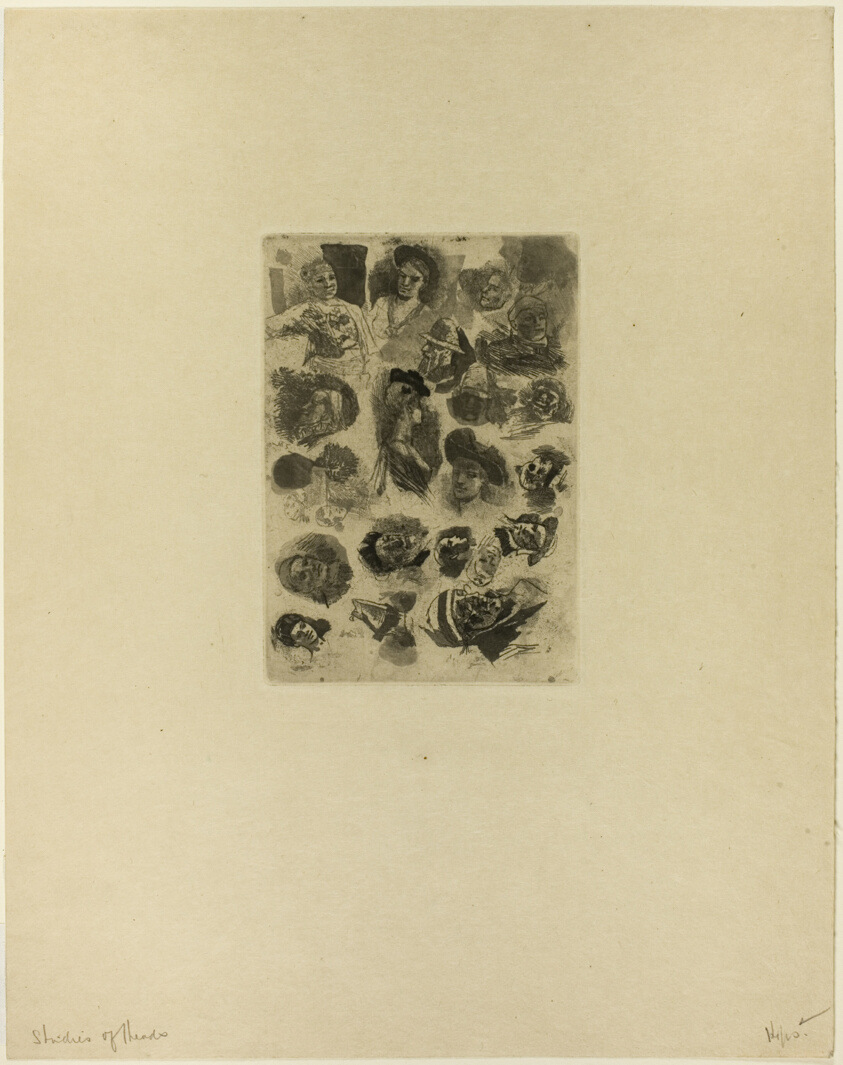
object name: Print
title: Hodgepodge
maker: Félicien Rops (Belgian, 1833-1898)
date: late 19th century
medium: Soft varnish etching (vernis mou), with aquatint and drypoint, in gray and black on cream wove paper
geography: Belgium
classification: etching; print; prints and drawing